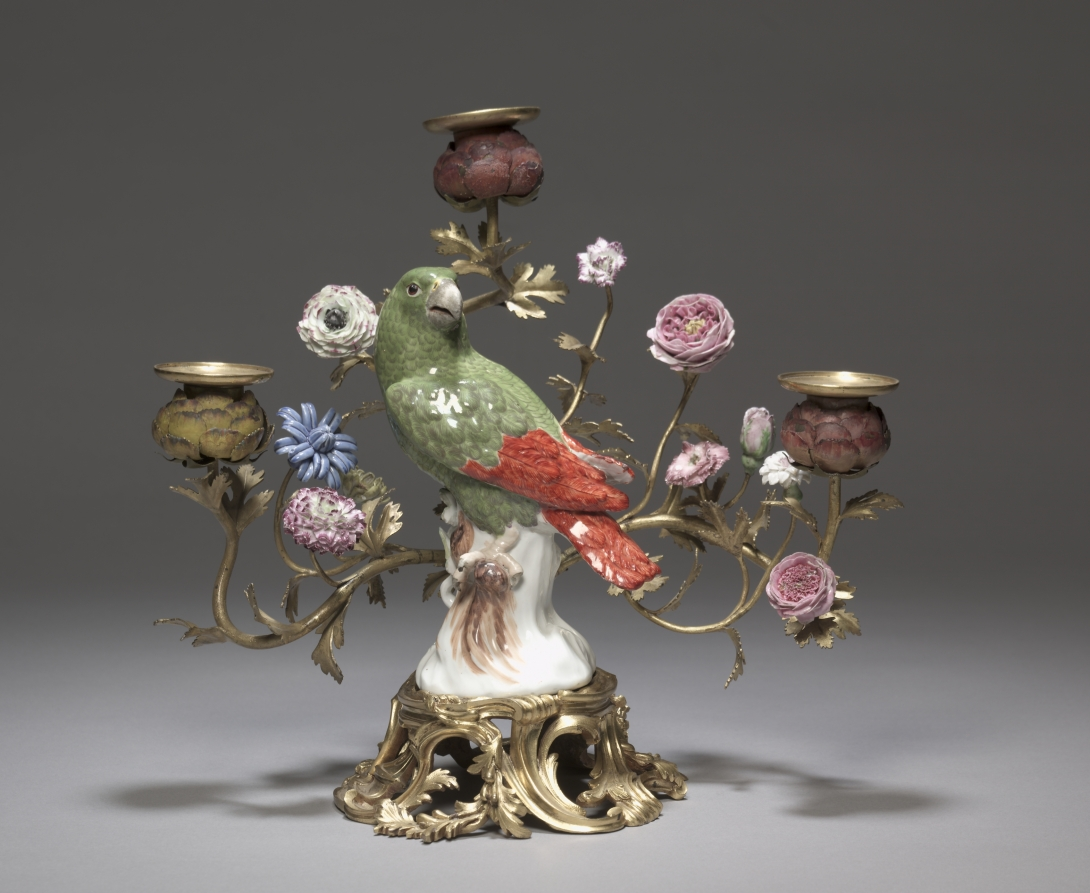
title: Candelabrum with Parrot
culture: Germany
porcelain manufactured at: Meissen Porcelain Factory (German, est. c. 1710)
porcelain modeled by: Johann Joachim Kändler (German, 1706–1768)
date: c. 1740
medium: porcelain mounted in gilt bronze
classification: Ceramic